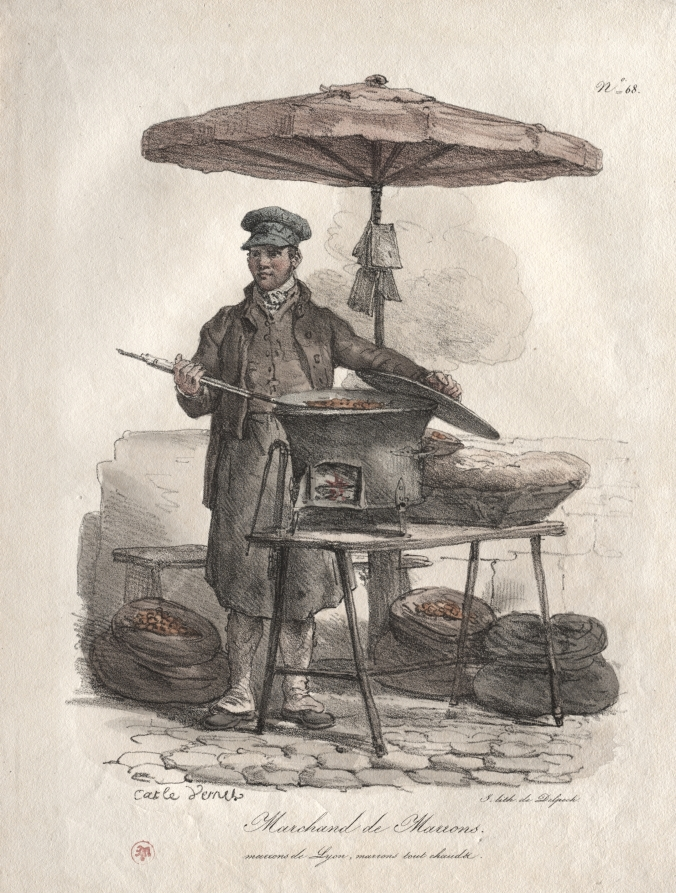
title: Chestnut Peddler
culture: France, 19th century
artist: Carle Vernet (French, 1758–1836)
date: c. 1780–1836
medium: lithograph, hand colored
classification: Print